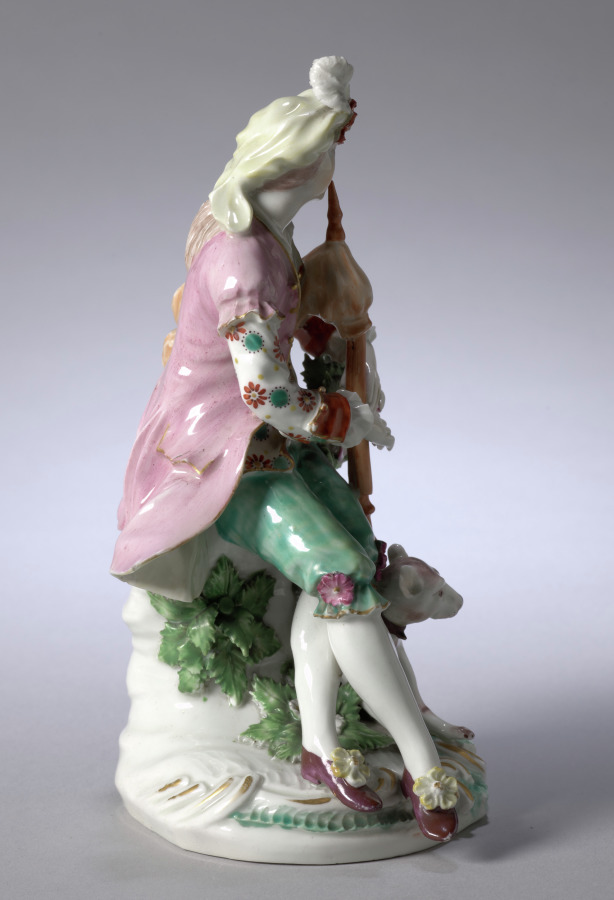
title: Seated Musician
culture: England, Derby, 18th century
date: c. 1765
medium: soft-paste porcelain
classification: Ceramic